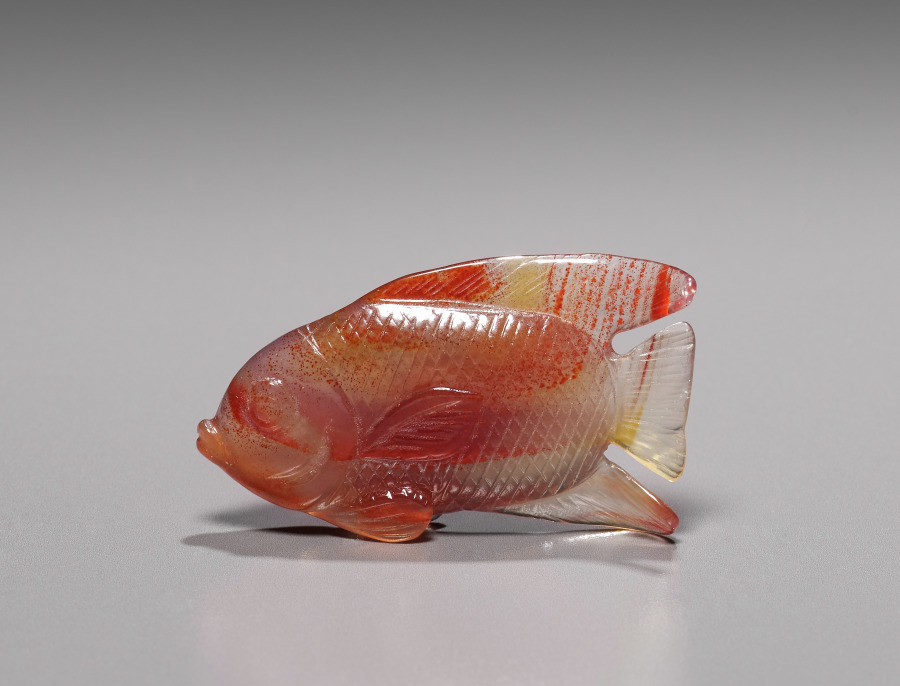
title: Fish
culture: Russia, St. Petersburg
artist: House of Fabergé (Russian, 1842–1918)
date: c. 1890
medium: agate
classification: Miscellaneous